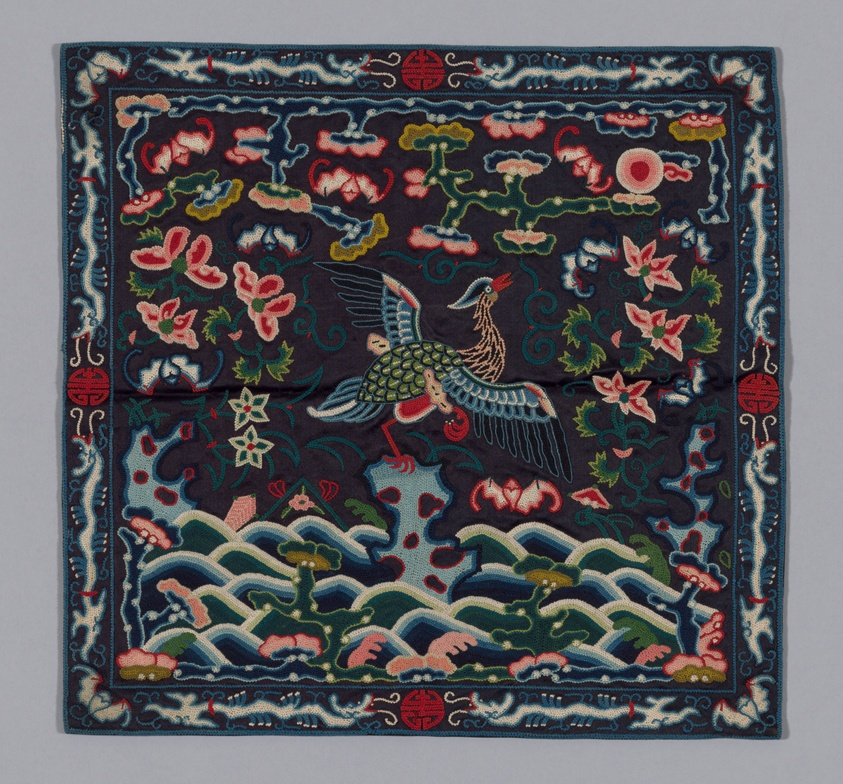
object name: Costume and Accessories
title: Badge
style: qing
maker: Manchu (China)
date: Qing dynasty (1644–1911), 1850/75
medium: Embroidered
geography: China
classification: textile; needlework (visual works); weaving; costume